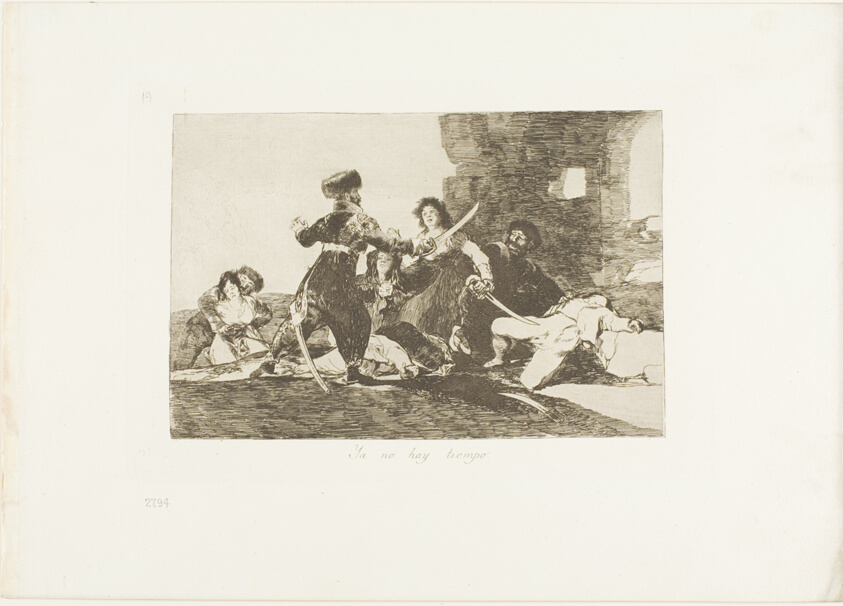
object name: Print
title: There isn't Time Now, plate 19 from The Disasters of War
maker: Francisco José de Goya y Lucientes (Spanish, 1746-1828)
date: 1810/12, published 1863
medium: Etching, lavis, drypoint, burin and burnishing on ivory wove paper with gilt edges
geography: Spain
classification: etching; print; prints and drawing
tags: war